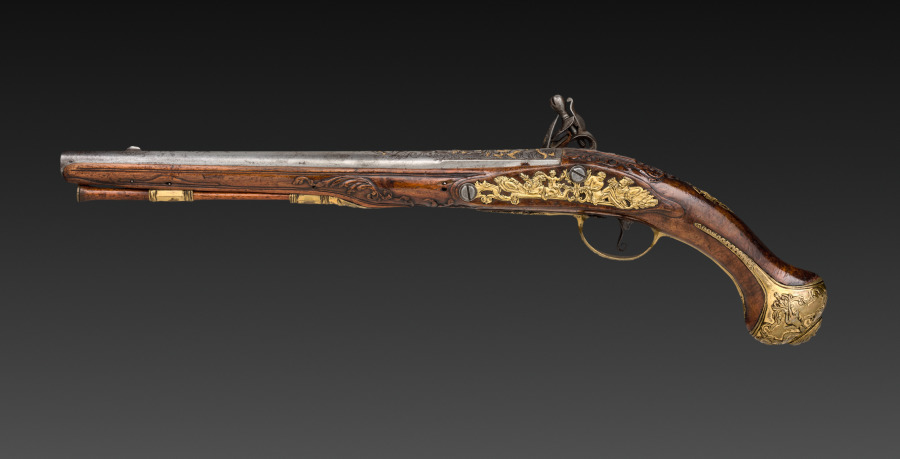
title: Flintlock Pistol (2 of 2)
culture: Franco-Flemish, Liège, early 18th Century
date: early 1700s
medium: steel with gold inlay, gilt-brass mounts; walnut burl stock; chiseled high-relief decoration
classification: Arms and Armor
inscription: on barrel: G. MASSIN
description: The barrel of this pistol is signed G. MASSIN, a gunsmith apparently working in eastern France or French-speaking Flanders, possibly the city of Liège. The exquisite ornament along the breech of the barrel is chiseled and engraved. The gilded lock-plate and mounts may be compared to the finest contemporary work in other media, such as furniture with ormolu mounts.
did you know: The flintlock ignition system was developed in the 1600s and remained the dominant system until the early 1800s.